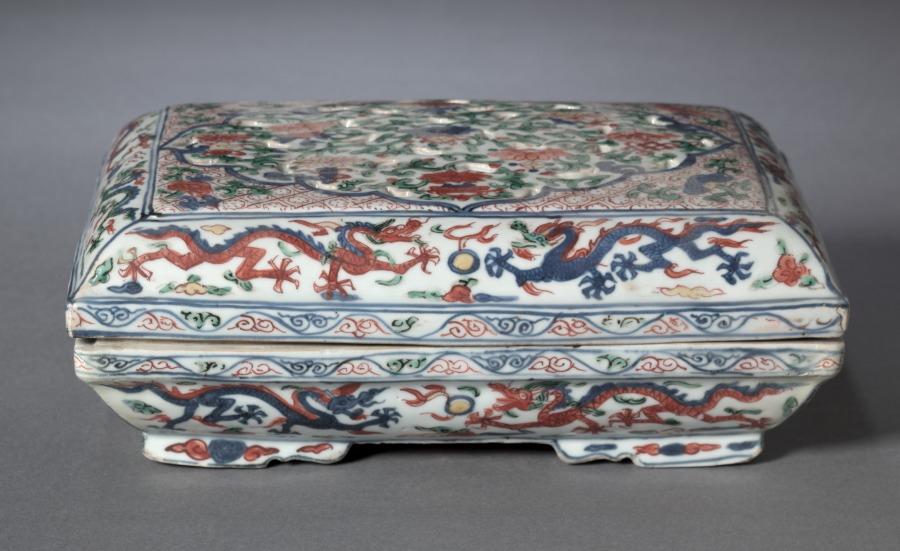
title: Box with Cover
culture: China, Jiangxi province, Jingdezhen kilns, Ming dynasty (1368-1644), Wanli reign (1572-1620)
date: 1573–1620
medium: porcelain with wucai (five color) overglaze enamel decoration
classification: Ceramic